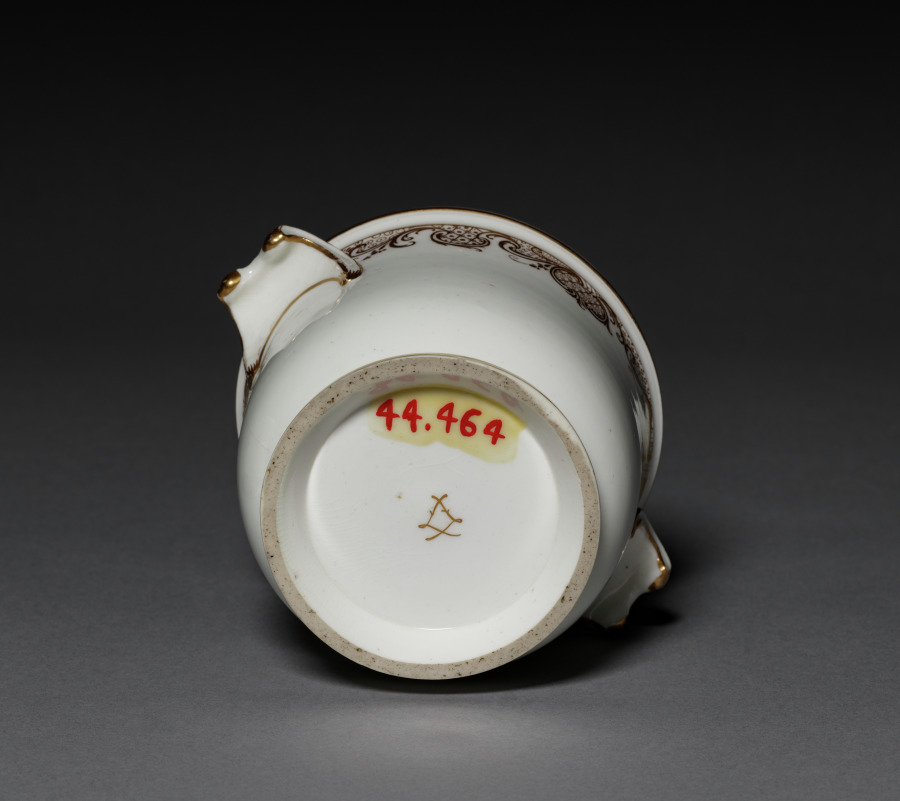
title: Flower Pot (2 of 2)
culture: France, Vincennes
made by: Vincennes Porcelain Factory (France, 1740–56)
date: 1745–53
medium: soft-paste porcelain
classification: Ceramic